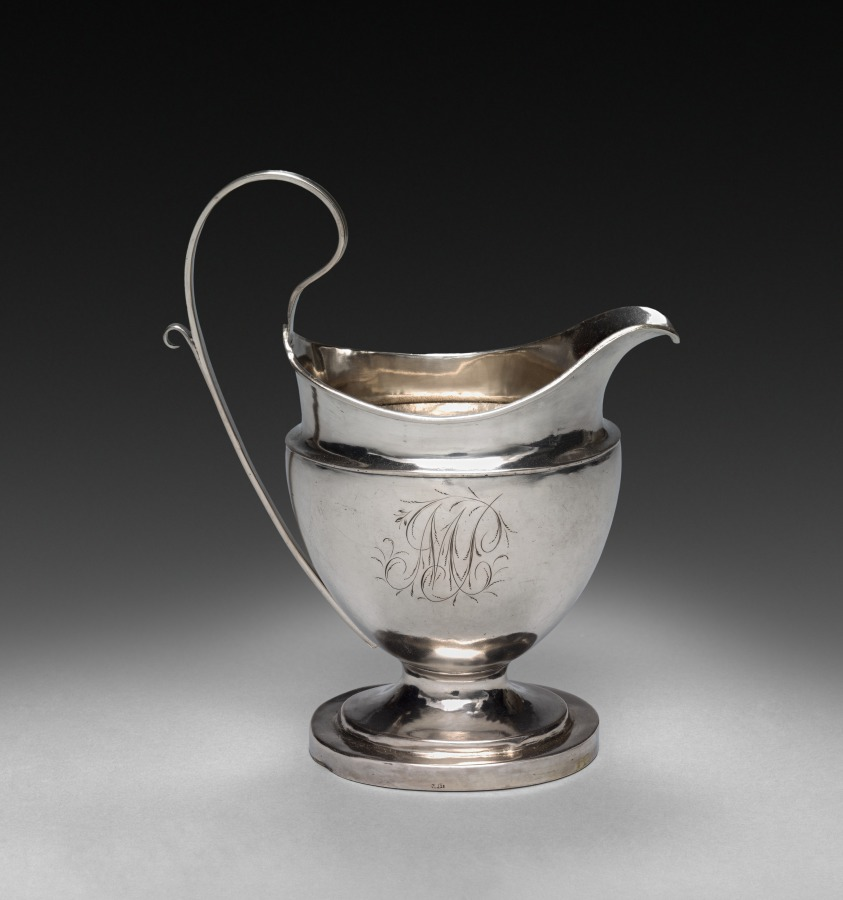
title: Cream Jug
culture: America, Pennsylvania, Philadelphia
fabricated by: William Haverstick (American, 1756–1823)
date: c. 1800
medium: silver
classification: Silver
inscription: engraved "MP" in bright-cut script on side to right of handle.